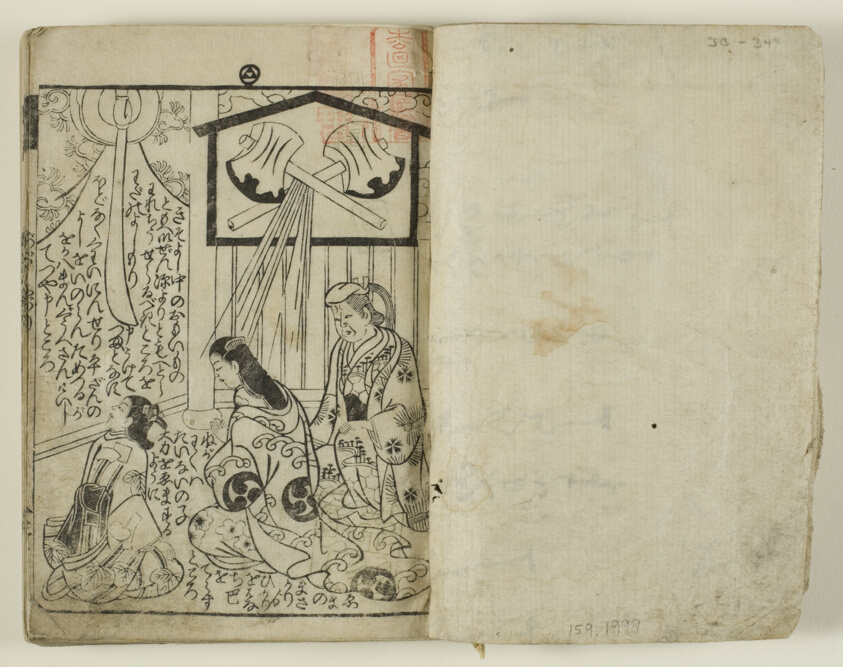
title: Asaina jigoku yaburi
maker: Torii Kiyotsune (active 1757-1779); Japanese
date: 1763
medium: Woodblock printed book, two volumes bound as one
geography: Japan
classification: book; asian art